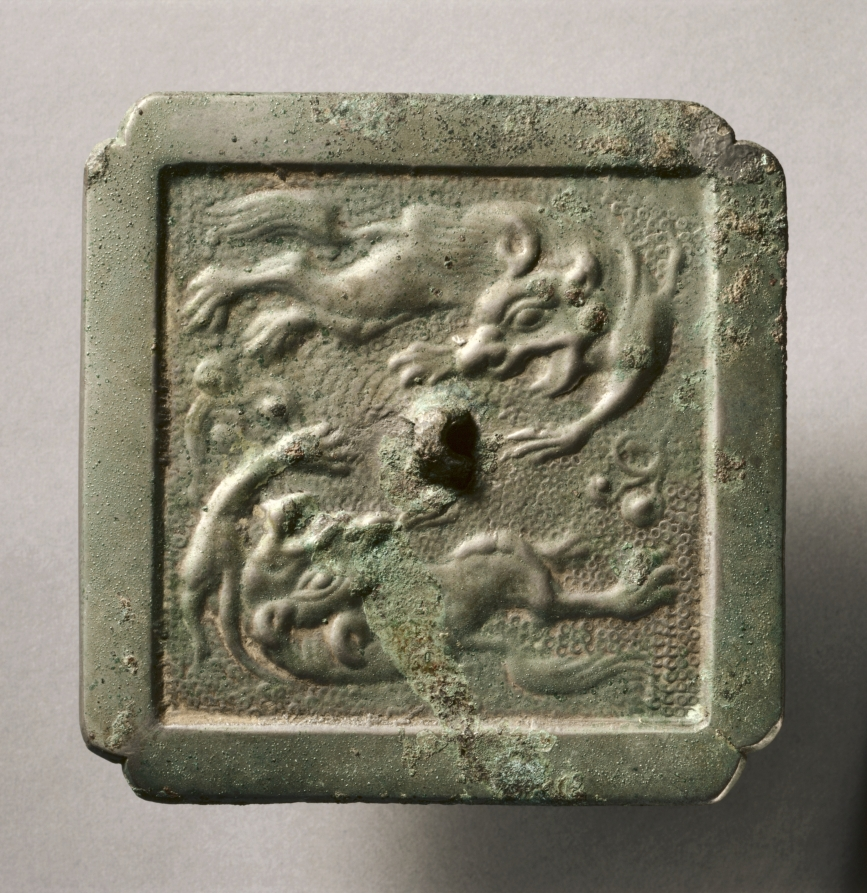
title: Cruciform Mirror with Two Lions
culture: China, Tang dynasty (618-907)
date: late 700s-early 800s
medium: bronze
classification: Metalwork